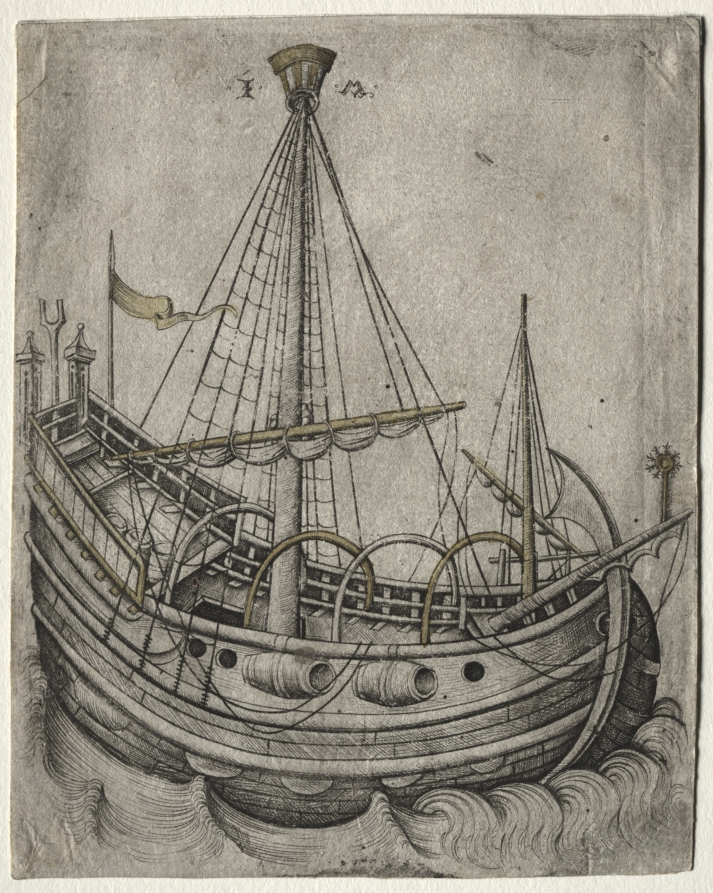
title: A Ship Moving Toward the Right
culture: Germany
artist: Israhel van Meckenem (German, c. 1440–1503)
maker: after Master W. with the Key (Netherlandish, 1435–1515)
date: c. 1475–80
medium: engraving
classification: Print